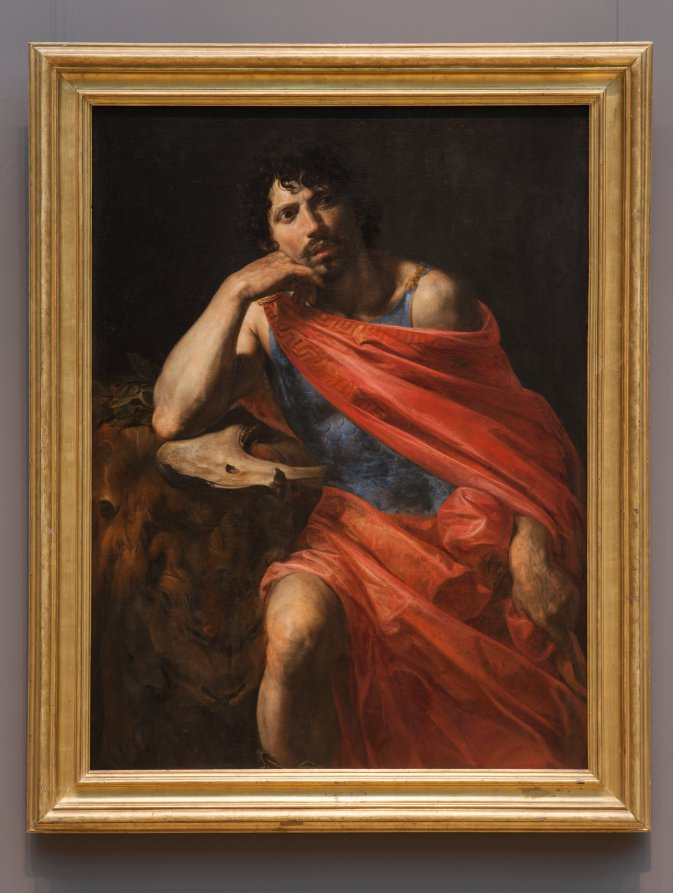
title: Samson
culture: France, 17th century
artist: Valentin de Boulogne (French, 1591–1632)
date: 1630–31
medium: oil on canvas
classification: Painting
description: The Old Testament hero Samson rests his head on his hand in a pensive, even melancholic pose. Objects on the table recall two of his heroic deeds: he killed a lion with his bare hands, and liberated the Israelites by slaughtering a thousand Philistines with a donkey’s jawbone. Samson’s cuirass, or breastplate, is joined at the shoulder by a clasp in the form of two bees—the emblem of the Barberini family, who commissioned the painting around 1630. In 1627, the Barberini had engaged Valentin to paint another biblical hero, David victorious with the head of Goliath; the canvas depicting Samson was designed to be its pendant.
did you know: The figure of Samson was likely a self-portrait of the artist.